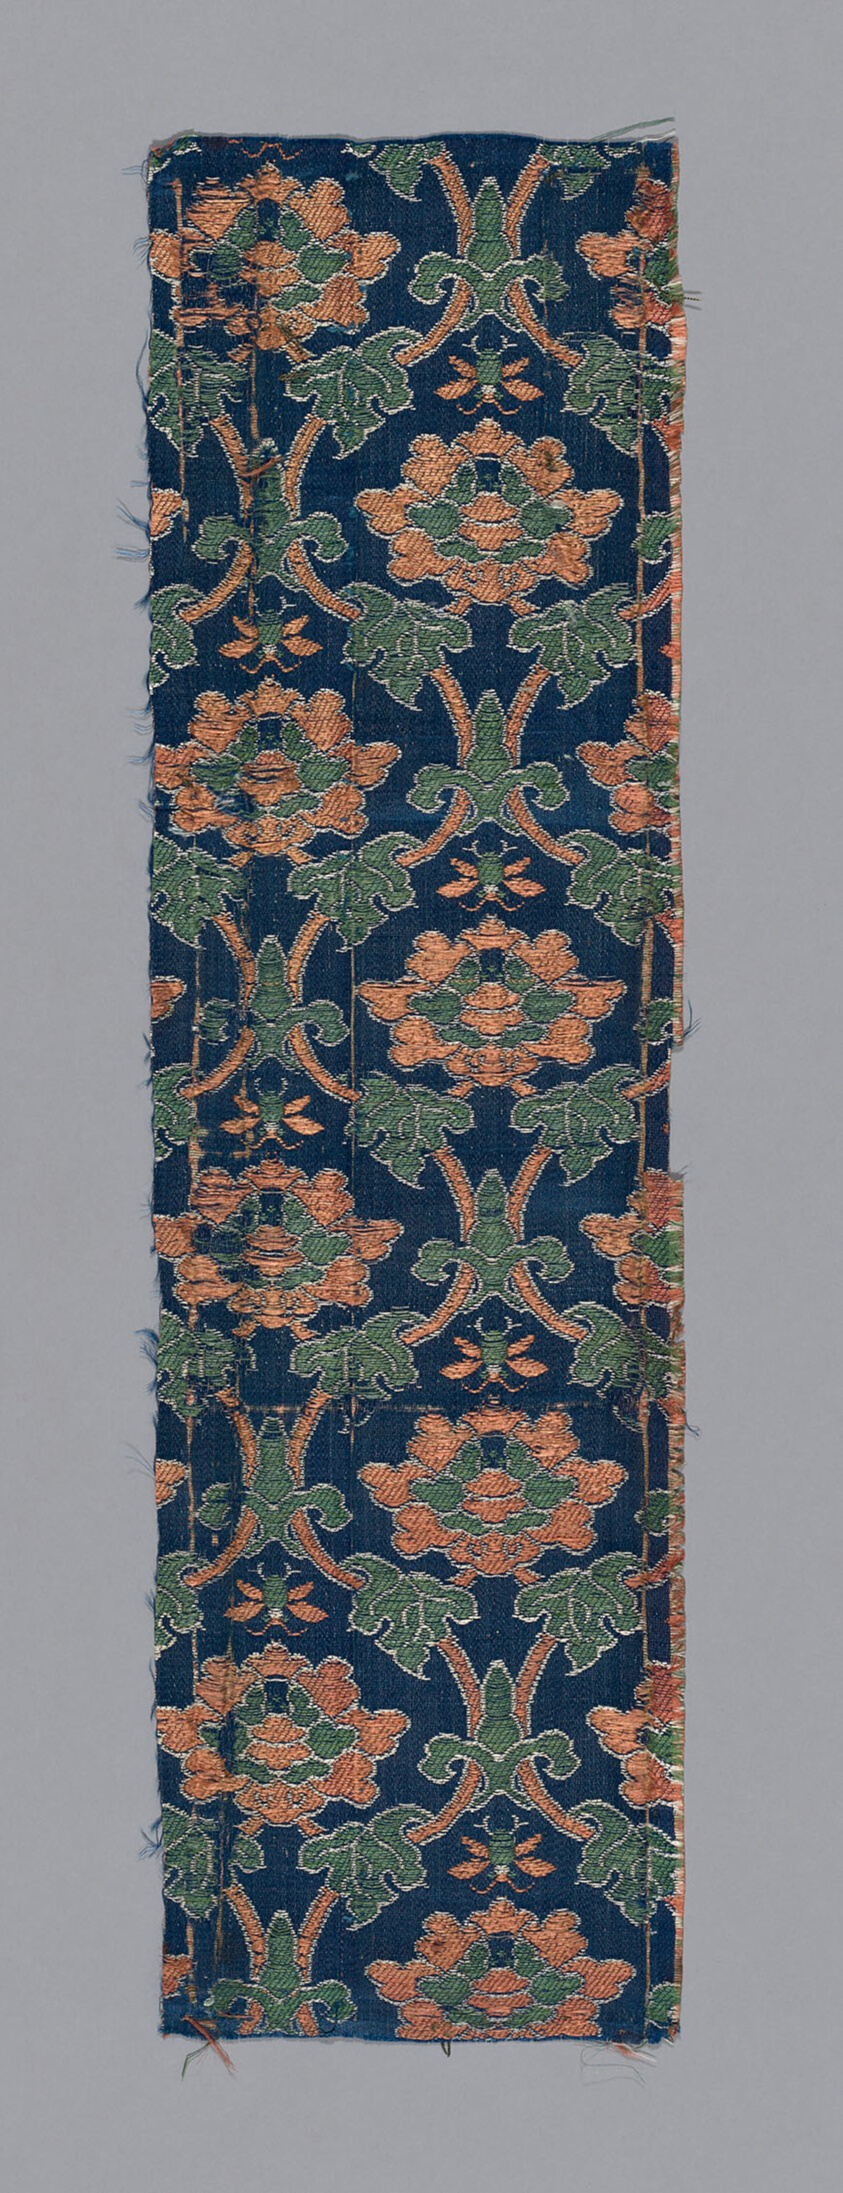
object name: Textile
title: Fragment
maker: Japan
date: Edo period (1615–1868), 1775/1825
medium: Fancy compound satin, silk.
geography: Japan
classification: textile; weaving